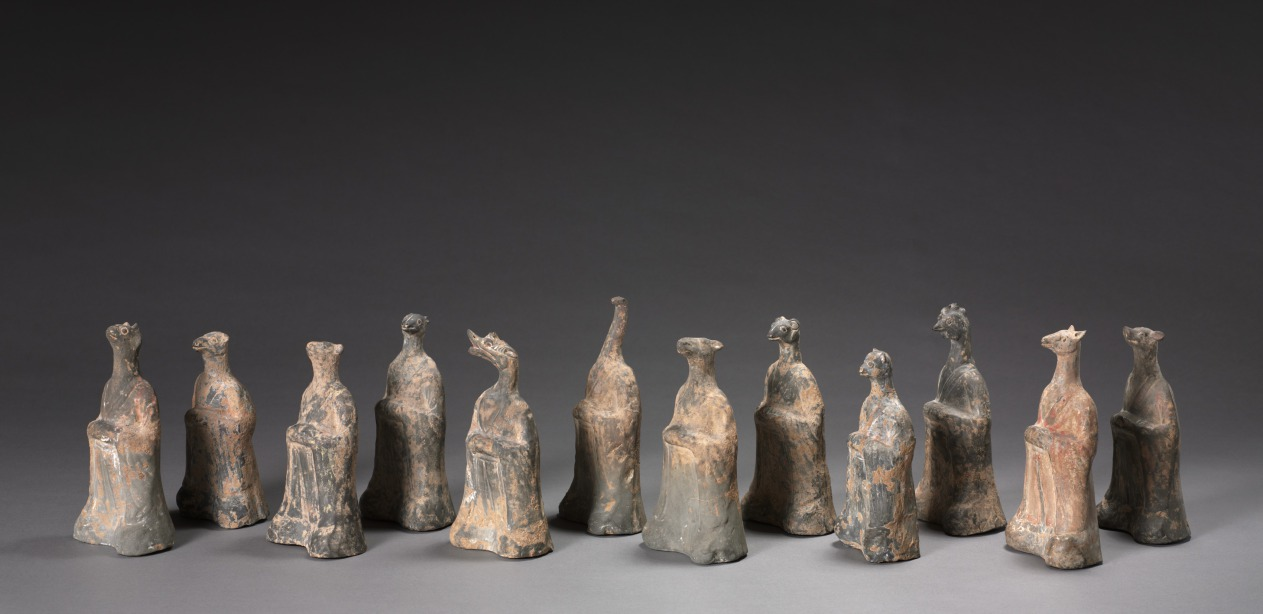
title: Mortuary Figures of the Zodiac Signs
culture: China, Northern Wei dynasty (386–534 CE)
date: 500s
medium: gray earthenware with traces of slip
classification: Sculpture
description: The twelve-animal zodiac series—rat, ox, tiger, rabbit, dragon, snake, horse, goat, monkey, rooster, dog, and boar—signifies a traditional Chinese concept of time structured in a cyclical order. The twelve animals are also linked to the art of fortune-telling that underlies human existence in connection with the changes of the universe. The use of the twelve zodiac animals as tomb furniture suggests they provided a cosmological structure for the afterlife.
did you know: These earthenware mortuary figures appear to have been made in molds.